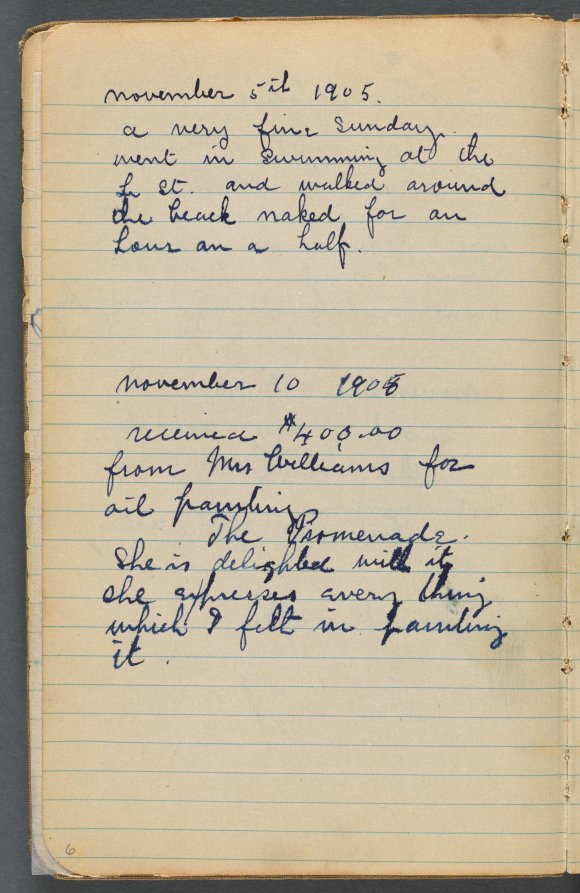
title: Sketchbook, page 006: Notes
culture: America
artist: Maurice Prendergast (American, born Newfoundland [now Canada], 1858–1924)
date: 1905–10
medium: graphite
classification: Bound Volume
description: This sketchbook contains 69 pages of drawings, a diary largely devoted to the state of the artist's health, and a three-page discourse on the nature of genius and ideas.